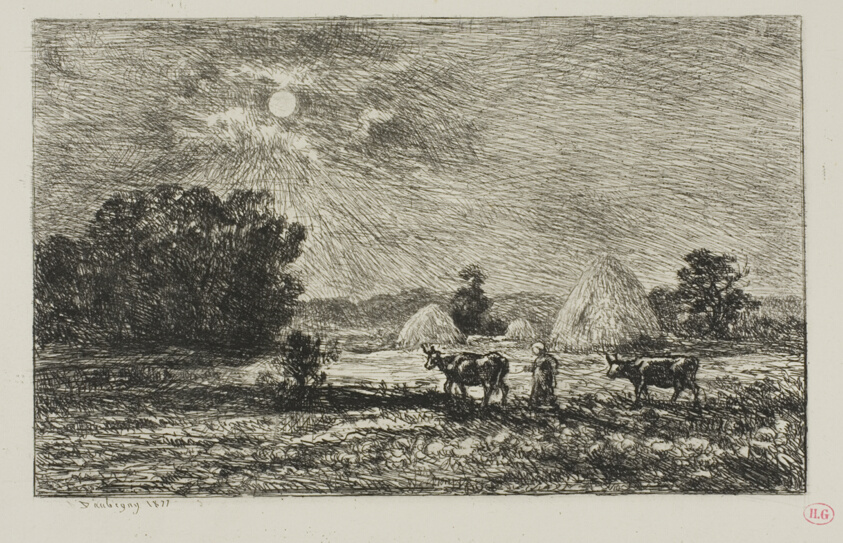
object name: Print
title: Moonlight in Valmondois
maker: Charles François Daubigny (French, 1817-1878)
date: 1877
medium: Etching and drypoint on ivory chine laid down on white wove paper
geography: France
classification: etching; print; prints and drawing